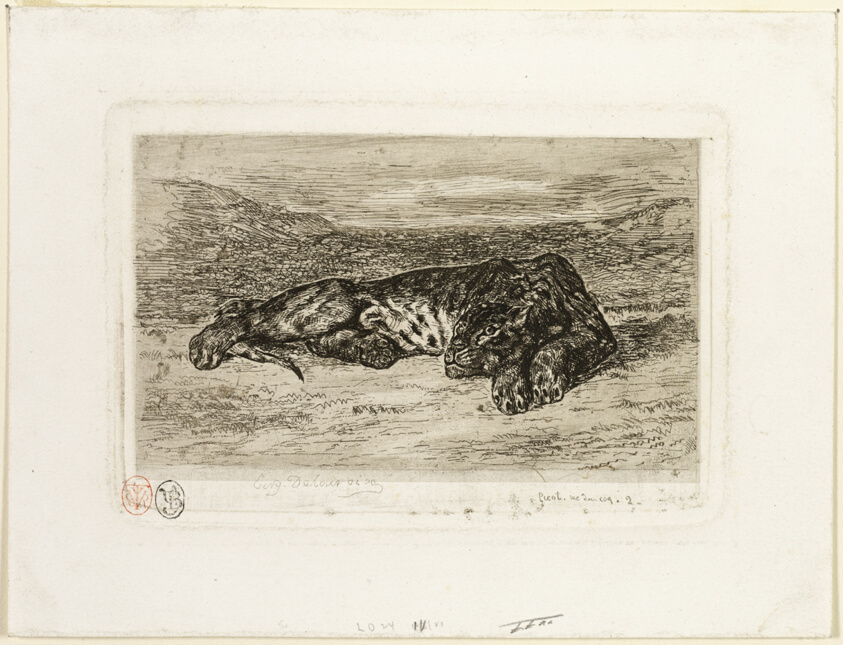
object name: Print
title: Tiger Resting in the Desert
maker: Eugène Delacroix (French, 1798-1863)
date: 1846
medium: Etching on off-white China paper, laid down on white wove paper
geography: France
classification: etching; print; prints and drawing